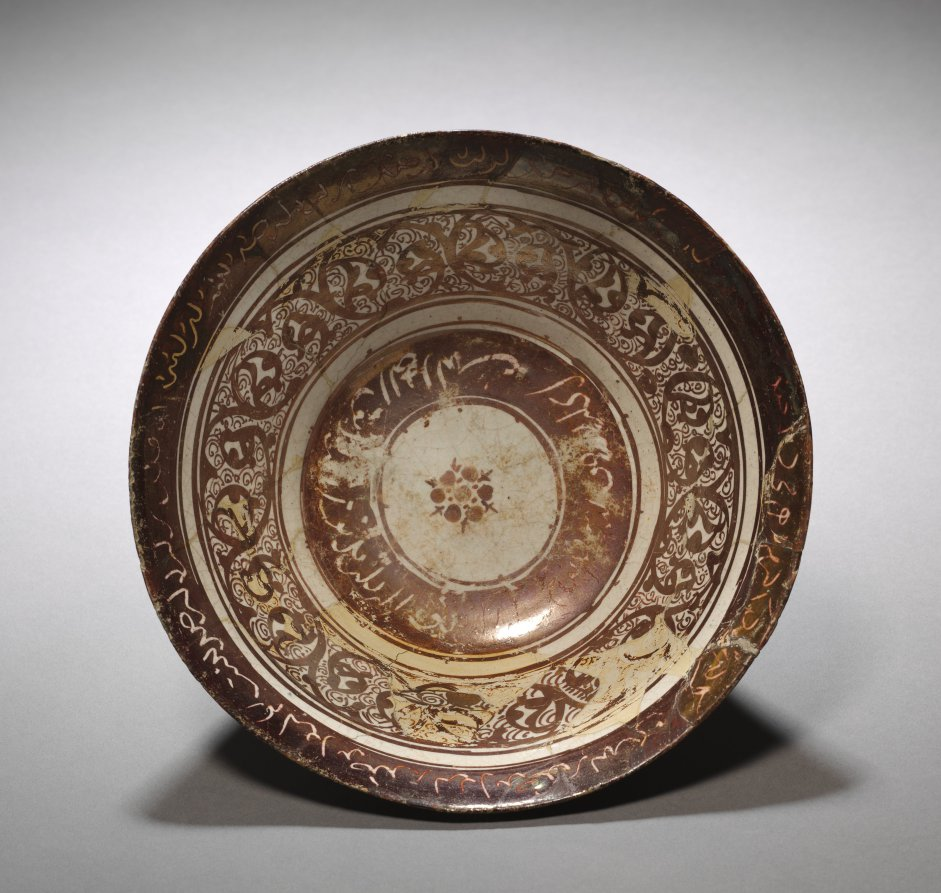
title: Bowl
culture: Iran, Kashan, Seljuq period of Iran (1037–1194)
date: early 1200s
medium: fritware with luster-painted design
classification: Ceramic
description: Fritware Where fine clay was unavailable, potters made a paste out of ground quartz, clay, and glass. When fired, the paste created a compact white material called fritware that approximated the appearance of porcelain.